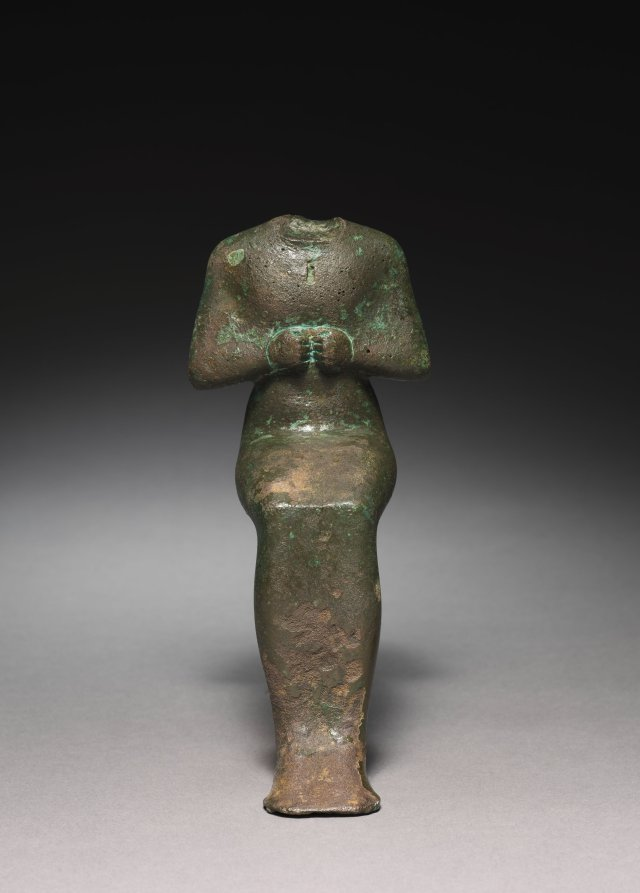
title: Statuette: Seated Mummiform Deity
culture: Egypt, Late period (715–332 BCE), Dynasty 26 or later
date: 664–525 BCE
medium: bronze, solid cast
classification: Sculpture